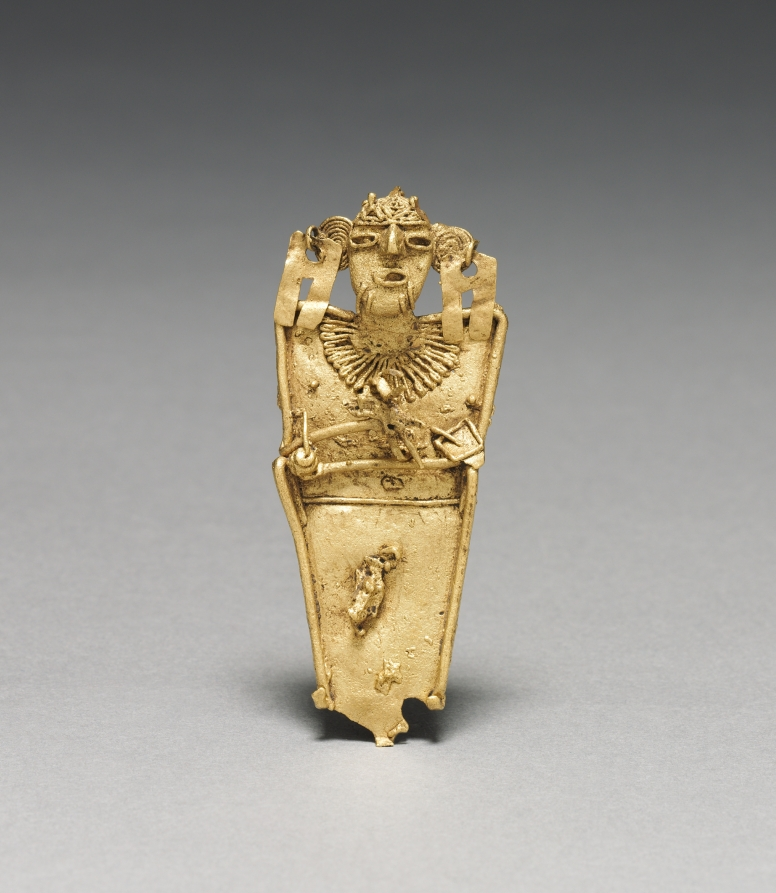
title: Tunjos (Votive Offering Figurine)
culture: Colombia, Muisca style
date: c. 900–1550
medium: cast gold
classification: Metalwork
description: Unlike the other gold ornaments made in the isthmian region, tunjos were not worn; instead, they served as offerings that were deposited in sacred places such as lagoons and caves. They often depict humans who hold something. Perhaps because they were not meant for display, tunjos were not finished after lost-wax casting. Flaws remain uncorrected, surfaces are unpolished, and gold that backed into the channel used to pour the molten metal into the mold was left in place.